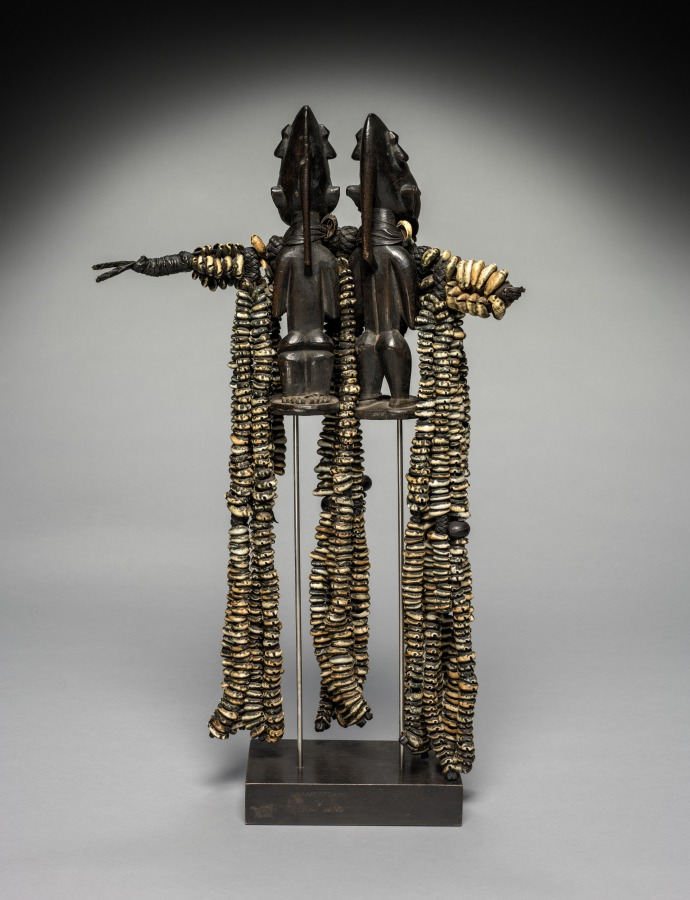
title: Dance staff for Èṣù (Ògò Èlẹ́gba)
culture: Africa, West Africa, Nigeria, Yorùbá-style maker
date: 1800s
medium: Wood, leather, cowrie shells, seeds, and natural fiber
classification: Sculpture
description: Èṣù (also called Èḷégba) embodies the most complex deity in the Yorùbá pantheon of gods. The messenger of the Yorùbá gods, Èṣù is also the bearer of sacrifices, guardian of the ritual way of life, and is associated with highly significant places including crossroads, markets, and home entrances. As seen here, Èṣù's power is often visually represented in Ògò Èḷégba (dance staffs); in this example, the unusually paired man and woman reference his ability to switch between the two genders, turn death into life (through childbirth), and to overcome the tension between the sexes. The male character bears a ritual flute reserved for this god. The abundance of cowrie shells means that Èṣù brings wealth.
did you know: If Eshu isn’t properly honored, trouble may befall the community or individual.